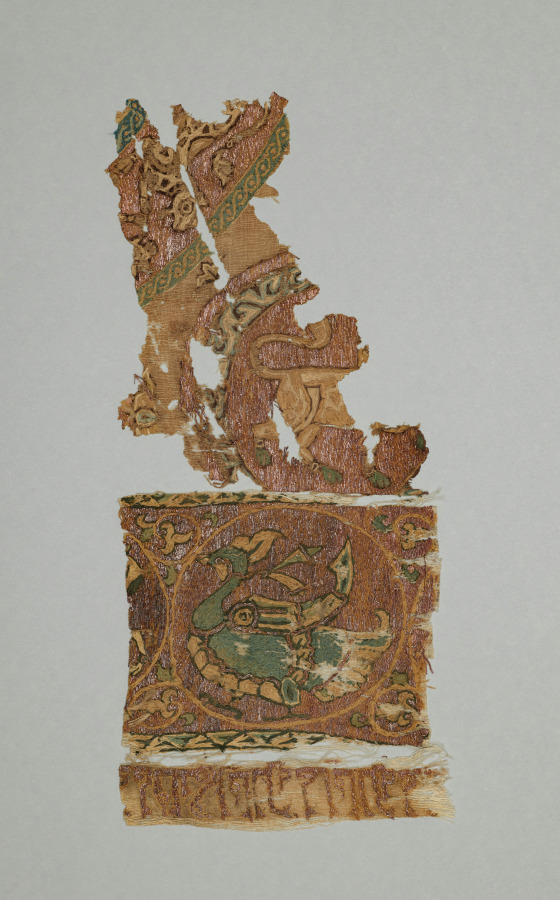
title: Embroidered border and field of animals in large roundels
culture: Iraq, probably Baghdad, Seljuk period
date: 1000s–1100s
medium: plain weave: silk warp and cotton weft (mulham): plain weave; silk and gold thread: embroidery, couched, split, running, and outline stitches:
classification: Textile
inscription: Kufic inscription in the narrow band at the bottom. Only the word "Allah" repeated twice can be deciphered.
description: This fragment preserves part of the main field and border of a large textile. At the top is a small segment of a roundel frame with fragments of a pair of confronted animals; at the lower right is part of a smaller roundel in which only the hind part of a lion or griffin remains. Below the roundels is a section of a wide border with a large bird wearing Sasanian flying ribbons about its neck. It is framed in a roundel formed by the tendrils of a scrolling vine. A narrow band at the bottom has a badly garbled Kufic inscription, which is upside down in relation to the rest of the pattern. Only the word "Allah" repeated twice can be deciphered.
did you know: Another fragment of this textile, lavishly embroidered with gilt-metal and silk thread on mulham, is now in the collection of the MFA Boston, 37.103.